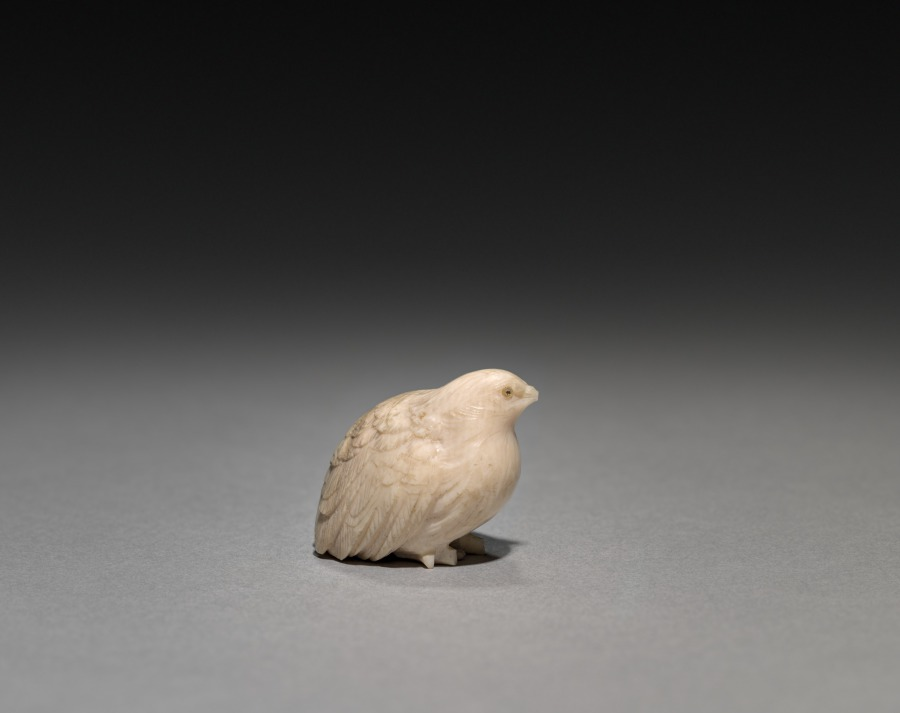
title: Quail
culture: Japan, Meiji period (1868–1912)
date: early 1900s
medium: ivory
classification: Ivory